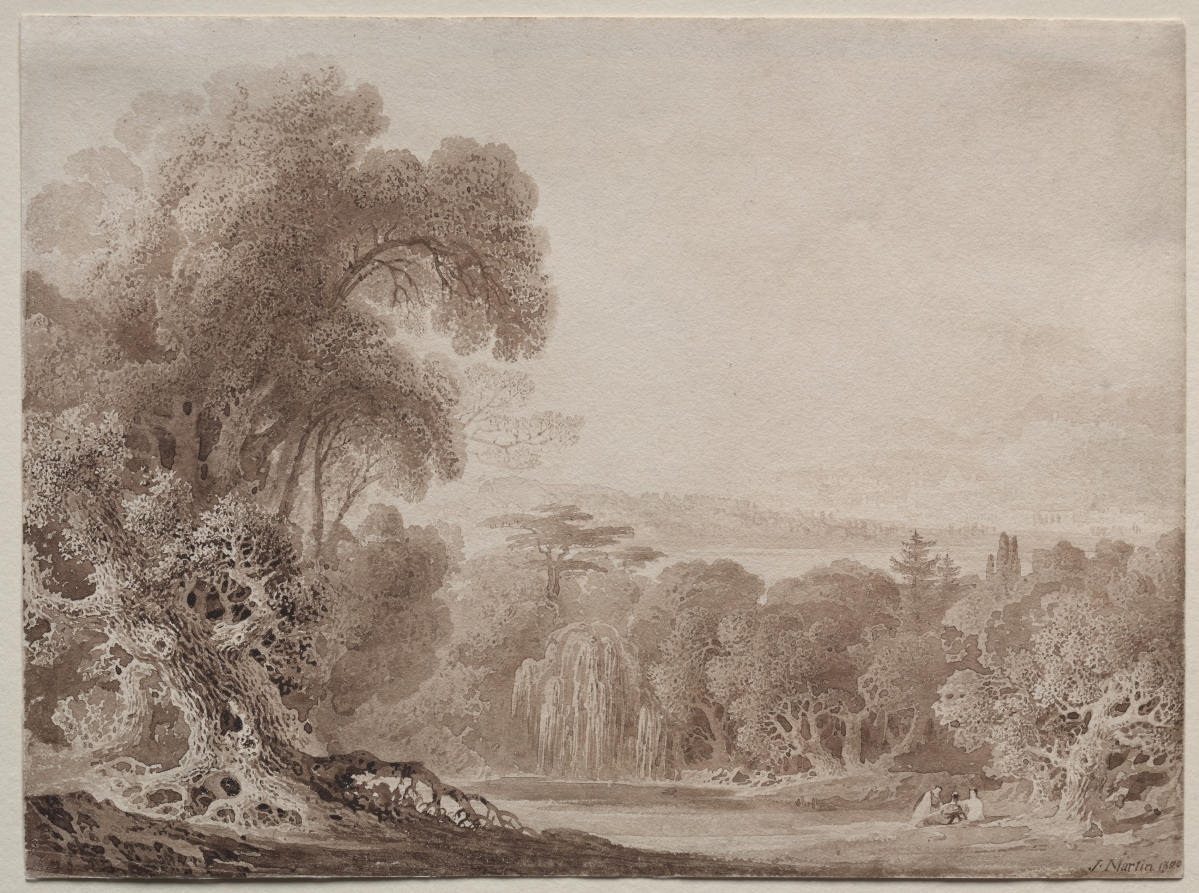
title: Figures Seated by a Lake in a Wooded Landscape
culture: England, 19th century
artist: John Martin (British, 1789–1854)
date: 1820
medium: brown wash and point of brush with graphite underdrawing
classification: Drawing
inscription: signed and dated, in brown ink, at lower right: J. Martin 1820; inscribed, in graphite, on verso, at center: William / No. 3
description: Before he became famous as a history painter, John Martin earned a living by teaching and painting watercolors. His so-called sepia drawings, landscapes in monochromatic wash, found an enthusiastic audience. The artist’s method for painting foliage in these drawings was idiosyncratic; form and texture were created almost entirely in negative spaces without the use of line. Highlighted leaves, bark, vines, and roots were delineated with the white of the paper, creating a peculiar, instantly recognizable, spongy effect.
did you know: John Martin's biographer believed that his early landscapes, such as this one, were inspired by classical texts by Ovid.